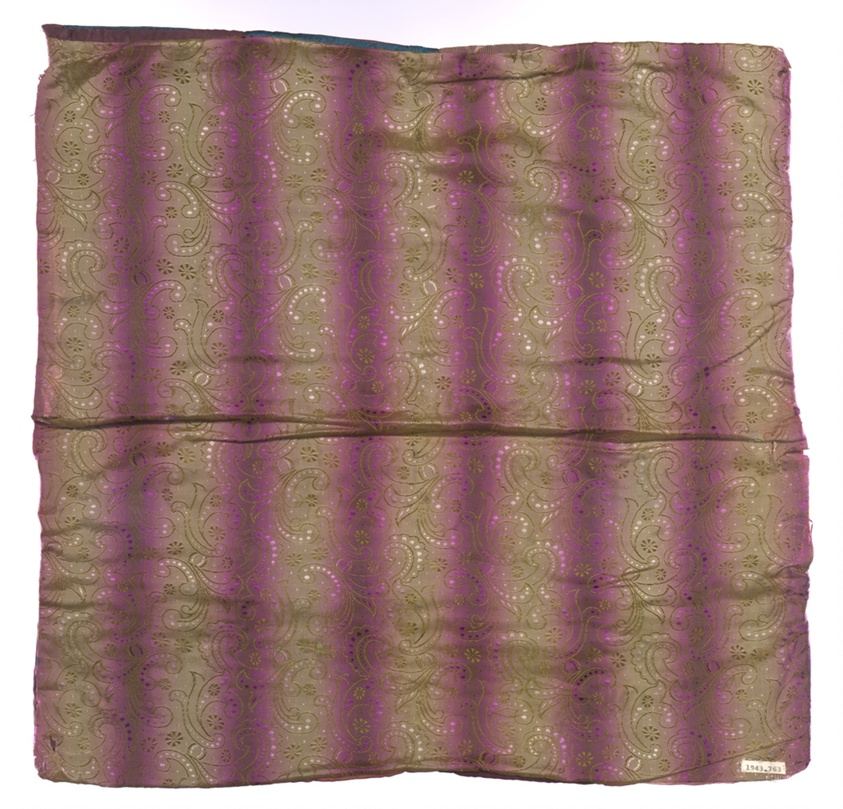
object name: Textile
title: Fragment (from a Bedcover)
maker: United States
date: 1875/1900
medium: Silk, plain, twill, and satin weaves, some with supplementary patterning warps or wefts, some self-patterned, and some with cut solid velvet; pieced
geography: United States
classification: textile; needlework - quilt